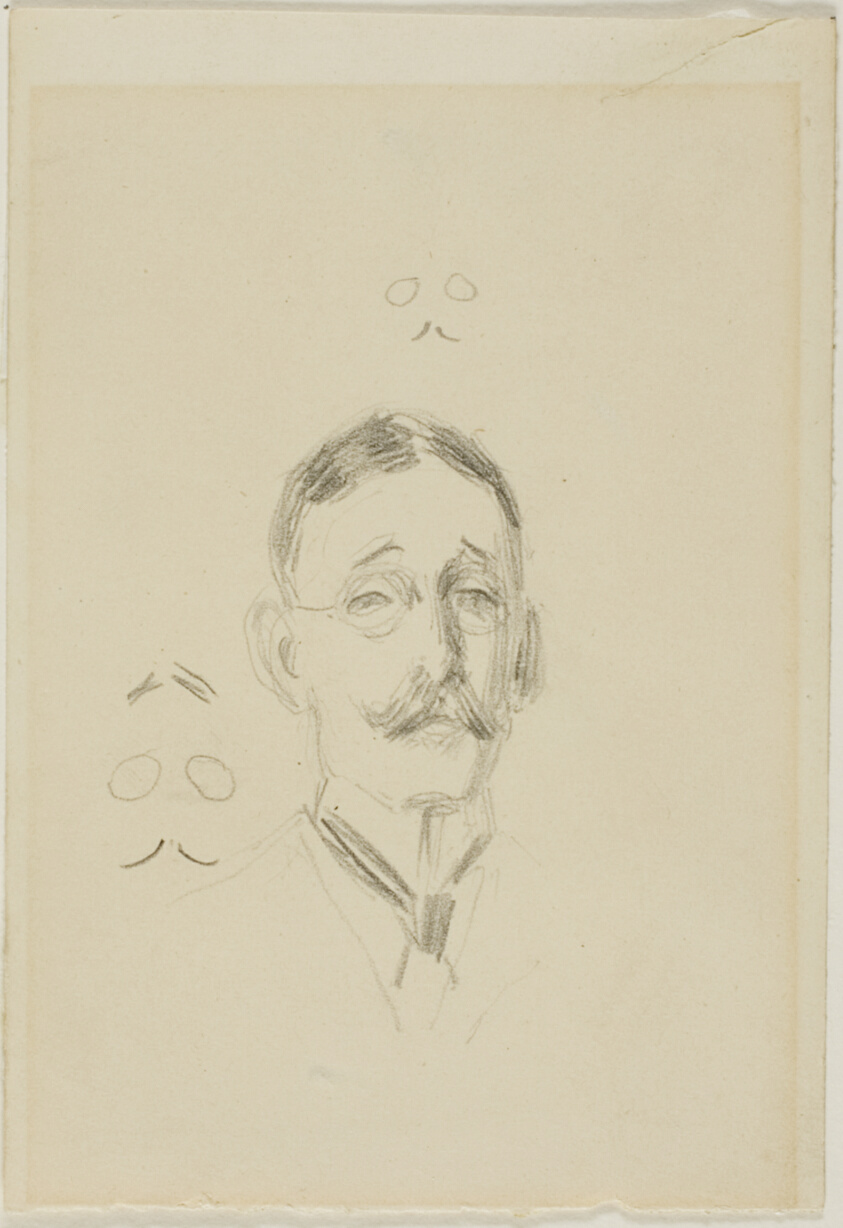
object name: Drawing and Watercolor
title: Head of a Man with Glasses with Two Sketches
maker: Anders Zorn (Swedish, 1860-1920)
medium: Black crayon, on cream wove paper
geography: Sweden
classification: crayon; drawings (visual works); prints and drawing